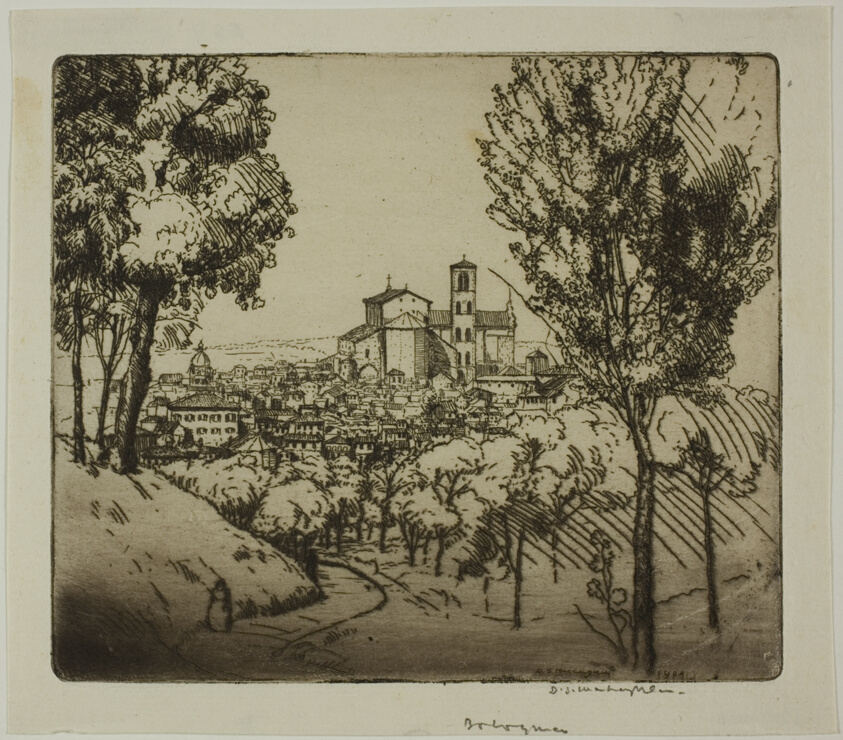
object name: Print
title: Bologna, Italy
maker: Donald Shaw MacLaughlan (American, born Canada, 1876-1938)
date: 1904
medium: Etching in black on cream laid paper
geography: United States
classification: etching; print; prints and drawing